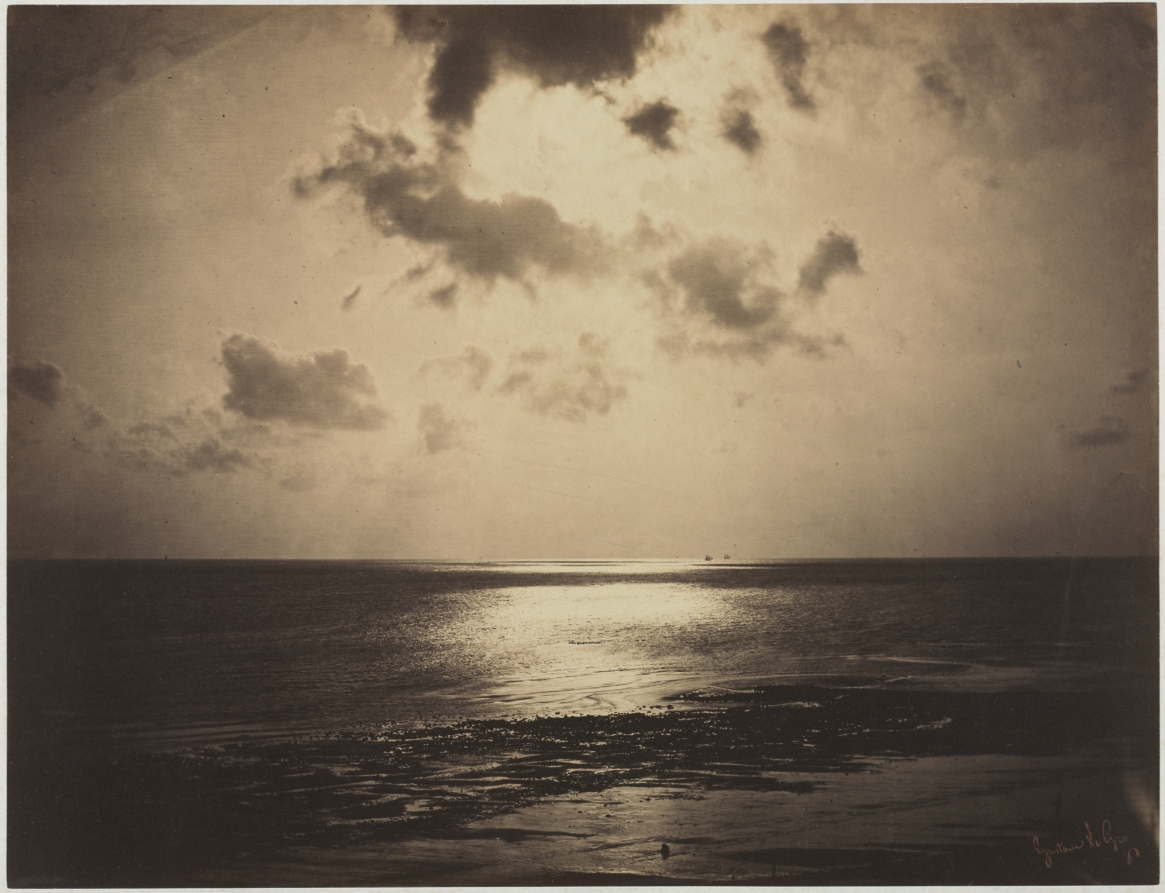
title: An Effect of the Sun, Normandy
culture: France, 19th century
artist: Gustave Le Gray (French, 1820–1884)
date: c. 1856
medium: albumen print from wet collodion negative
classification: Photograph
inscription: Written in red ink on recto: "Gustave Le Gray"; on label on recto: "All titles Effet du [sic] Soleil Ocean No. 23"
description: Exploring the dramatic effects of sunlight, clouds, and water, Gustave Le Gray gained immediate recognition for his landmark photographs of the Mediterranean Sea and the English Channel taken between 1856 and 1858. At this time photographic emulsions were not equally sensitive to all colors of the spectrum, making it impossible to achieve a proper exposure for both sea and sky in a single image. Thus, for may of his seascapes Le Gray printed two negatives on a single sheet of paper, a technique called combination printing. One negative was taken of the water and the other of the sky. The overlap often apparent in such multiple negative images is not visible in this skillfully executed print.